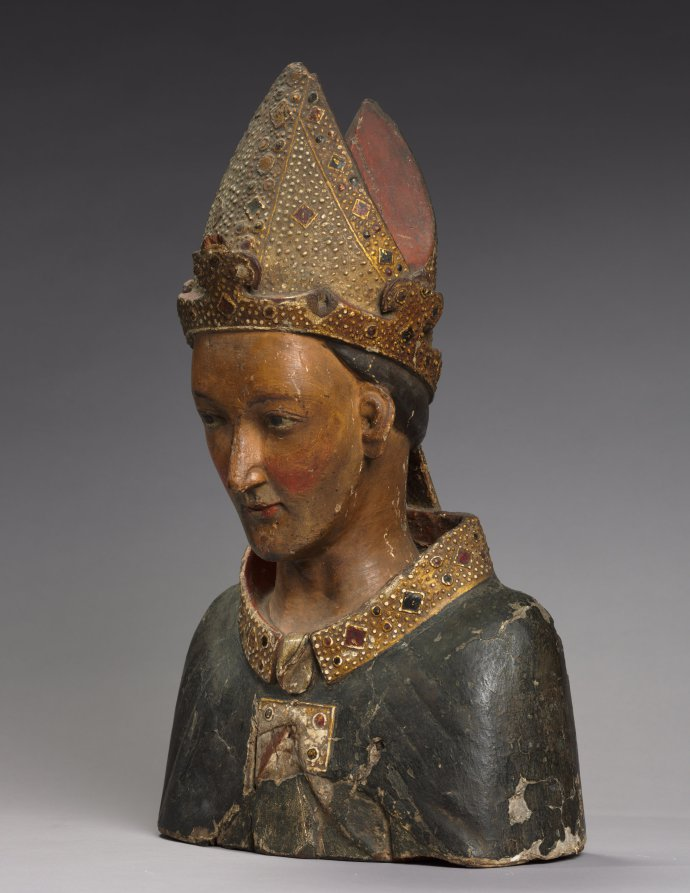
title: Bust Reliquary of St. Louis, Bishop of Toulouse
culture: Italy, Tuscany, Siena(?)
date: late 1300s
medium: wood (walnut) with polychromy, gesso and gilding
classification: Sculpture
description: This reliquary bust was probably made to house a relic of Saint Louis, Bishop of Toulouse (1274–97), second son of Charles II of Anjou, King of Naples (1288–1309). Renowned for his works of charity, he was made bishop in 1297 and died shortly after at the age of 23. He was canonized in 1317, and his cult of veneration spread rapidly in Italy and Spain. In art, Louis is generally represented as a "boy" bishop without a beard and with youthful features. The relic (now lost) would have been enshrined within. On feast days the reliquary would have likely been carried in procession and otherwise placed in a church sanctuary or on a side altar for the veneration of the faithful. Relics were the physical remains of the saints, chiefly their bodies. The living venerated the relics of the saints in order to seek their patronage, which in turn provided a proximate link to the divine ruler. The power of the saints was therefore manifested by and through their relics, or objects that were owned or touched by them. Medieval pilgrims, in a world fraught with peril, sought close physical contact with relics, which protected both the spiritual and temporal welfare of laypeople and religious communities.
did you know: This small bust was hewn out of wood, but painted realistically. Its life-like accuracy gave the medieval worshipper the sense that they were in the presence of the beloved bishop Saint Toulouse.